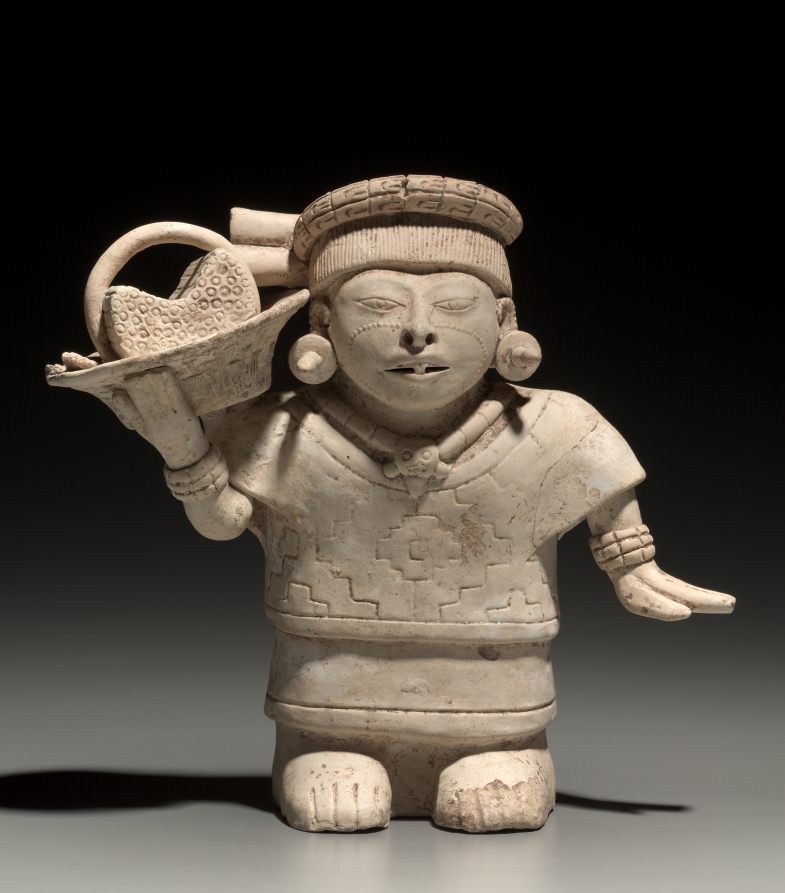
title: Standing Female with Basket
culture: Mesoamerica, Veracruz, Nopiloa style, 7th-10th century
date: 600–1000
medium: ceramic, slip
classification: Ceramic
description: This figure's delicate face features rows of raised dots on the cheeks and the edges of the ears, perhaps representing ornamental scarification; the teeth are decoratively filed into a T or tau shape that may have had symbolic import. On her shoulder she carries a basket or bowl filled with a yet-to-be-identified bundle, perhaps marshy bulrushes. The headdress ties have been lost from one side of the head.